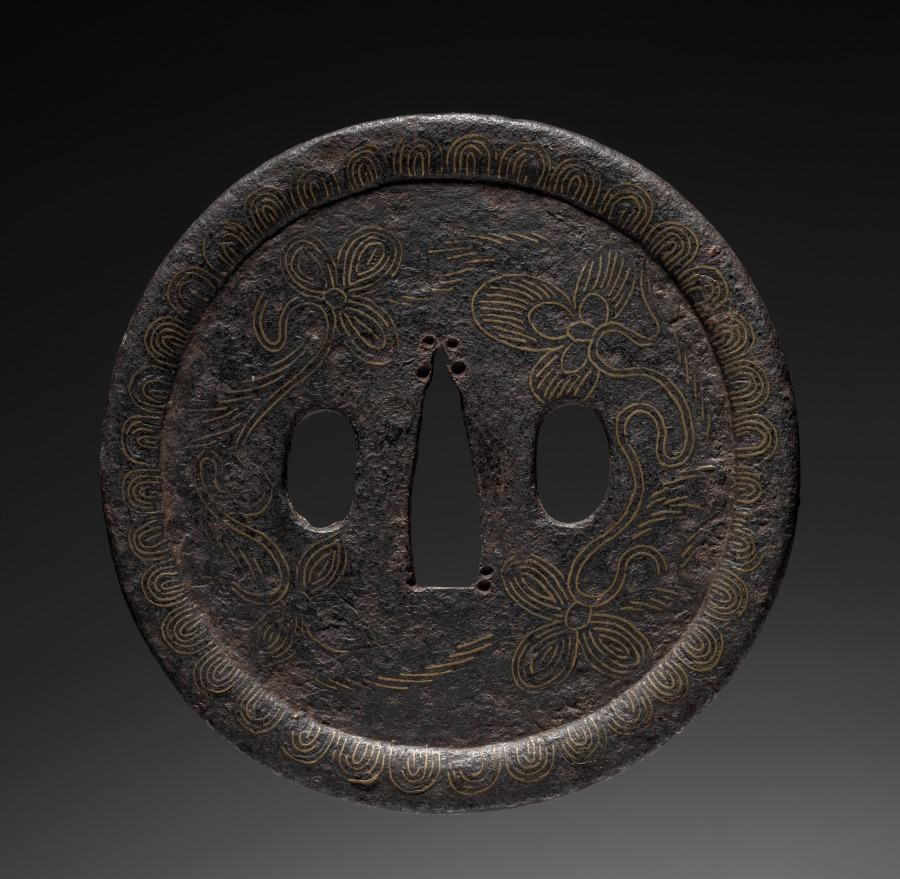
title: Sword Guard (Tsuba)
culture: Japan, possibly Edo period (1615-1868)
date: c. 1615–1868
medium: iron with brass inlay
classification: Arms and Armor